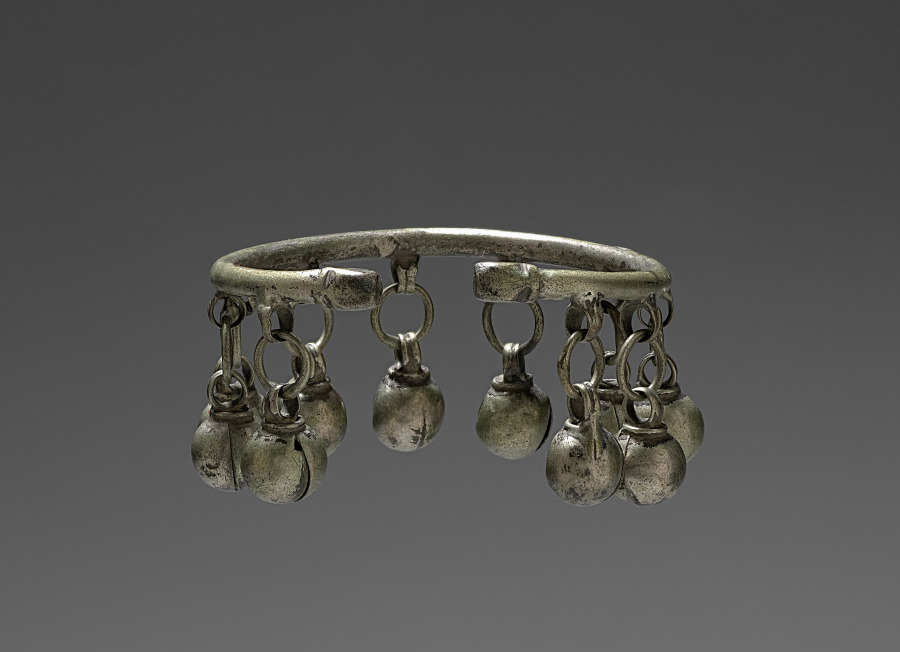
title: Wristlet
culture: India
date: 1800s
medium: silver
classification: Jewelry